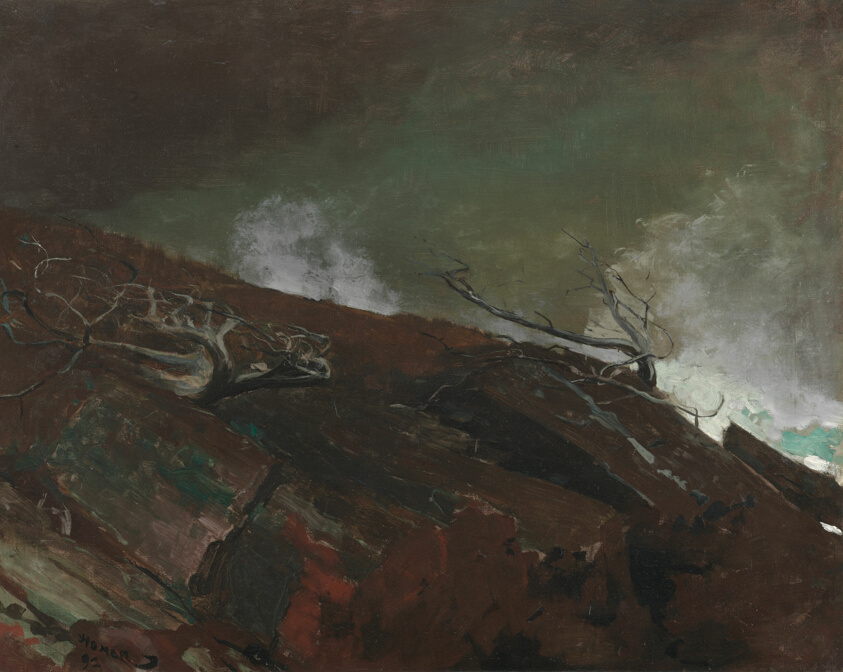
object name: Painting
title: Coast of Maine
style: Impressionism, Realism, Modernism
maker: Winslow Homer (American, 1836–1910)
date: 1893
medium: Oil on canvas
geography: United States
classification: painting; american arts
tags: landscapes